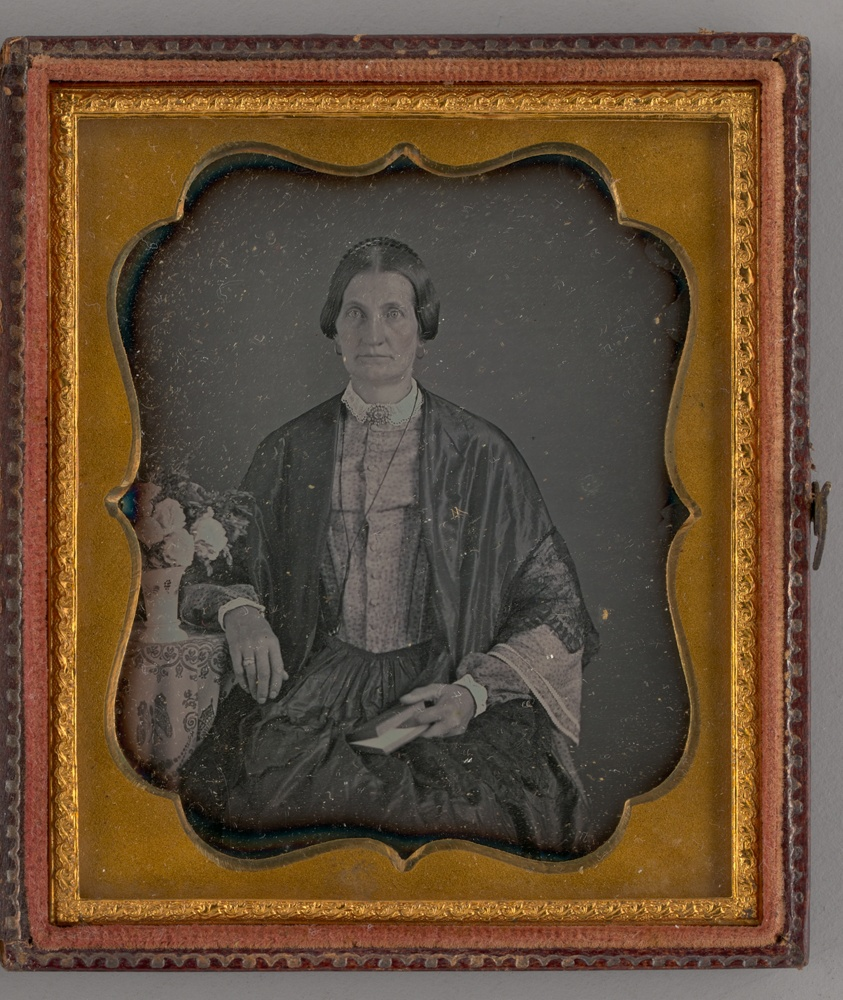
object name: Photograph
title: Untitled (Eliza Adam)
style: 19th century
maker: A. B. Tubbs (American, 19th century)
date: 1860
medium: Daguerreotype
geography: United States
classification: portrait; photograph; photographic process; photography; portrait; daguerreotype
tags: lundberg collection, portraits, portraits: female subject, female, portrait